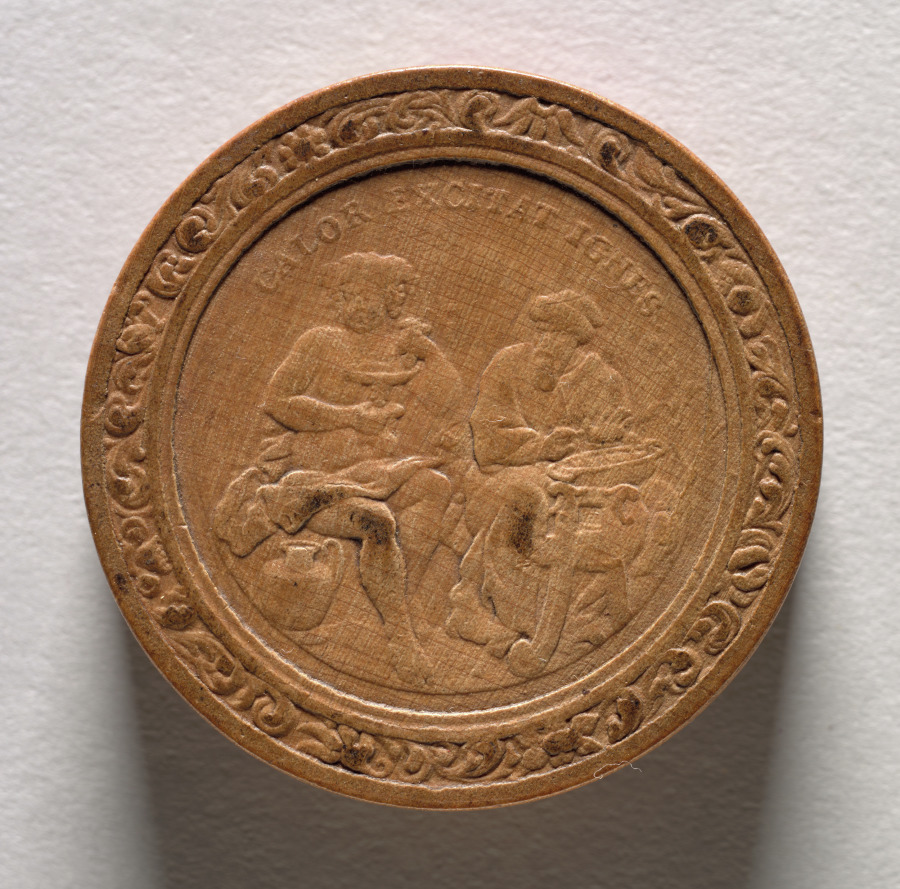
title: Gaming Piece (obverse)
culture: Germany, late 17th-early 18th Century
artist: Martin Brunner (German, 1659–1725)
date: c.1700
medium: wood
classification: Furniture and woodwork